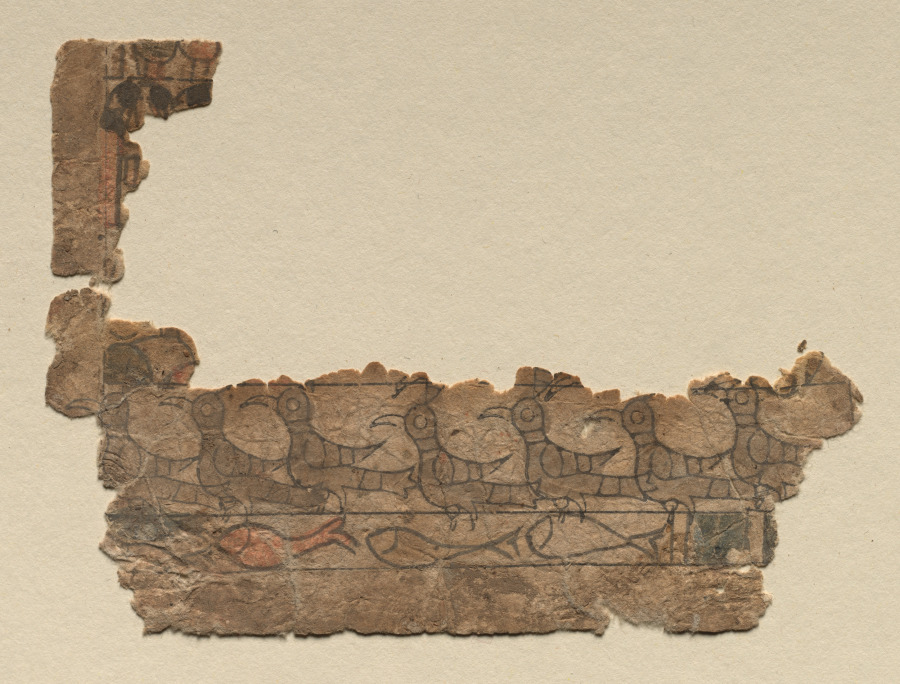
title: Cartoon for Textile Design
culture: Egypt, 10th century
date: 900s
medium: drawing and color on paper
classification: Drawing